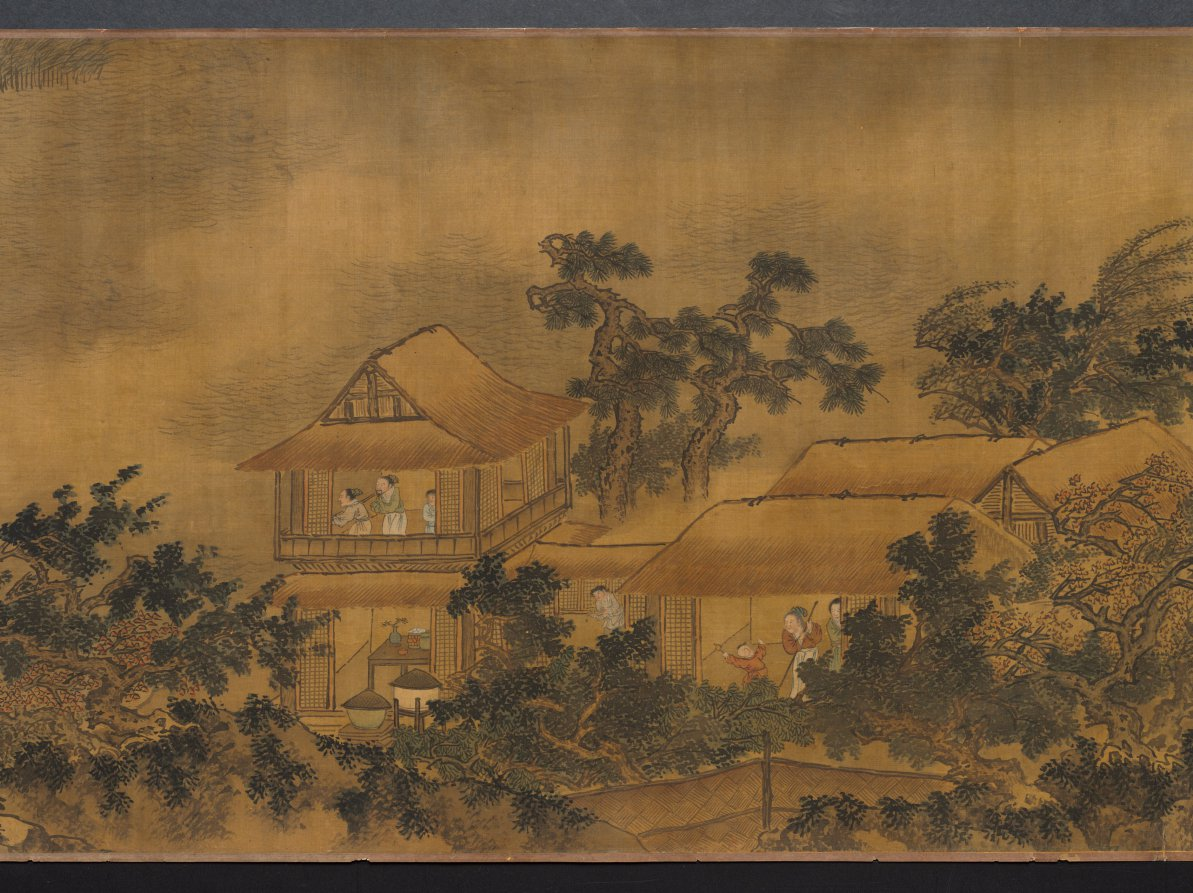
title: Returning to the Village in a Rainstorm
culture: China, Ming dynasty (1368–1644)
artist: Xie Shichen (Chinese, 1487–after 1567)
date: 1530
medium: Handscroll; ink and light color on silk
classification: Painting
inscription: 風雨歸村圖 嘉靖庚寅秋日樗仙謝時臣. [印] 謝時臣印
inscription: 3 additional seals unidentified.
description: This scroll depicts a wind- and rainswept landscape with figures in the countryside struggling against a late summer monsoon rainstorm. Such weather was familiar to residents of the lower Yangzi delta. Xie Shichen spent most of his life in the Suzhou area. Details of his career are scant, but his surviving works suggest that he made his living as a professional painter. This painting conveys drama and anecdotal observations, characteristic of Zhe school paintings, such as the one by Lü Wenying, CMA 1970.76.